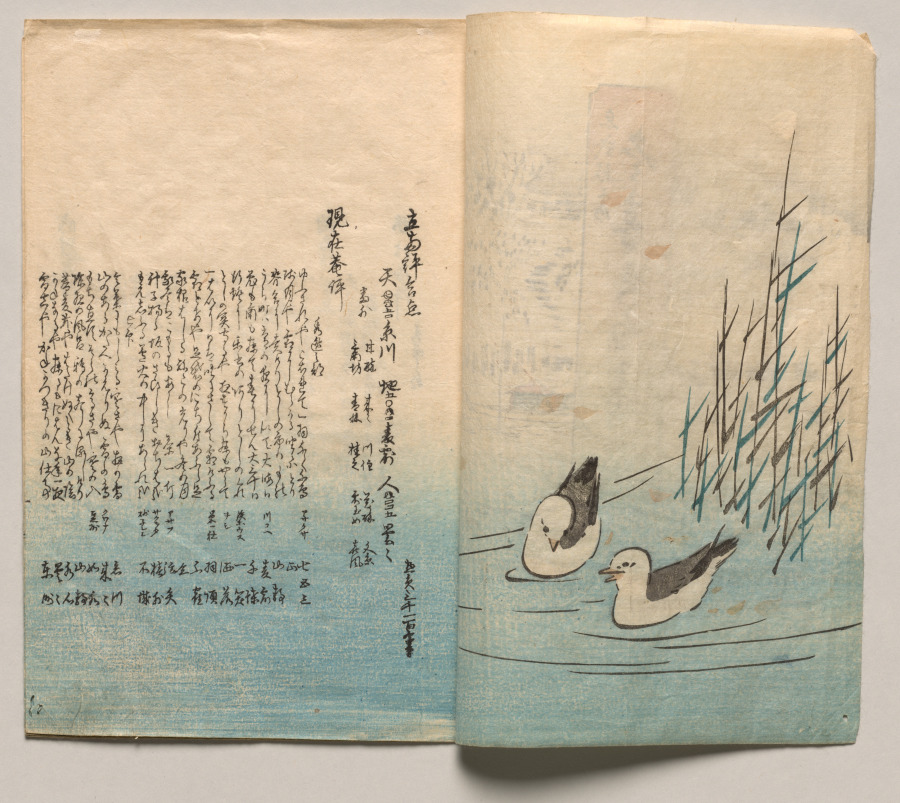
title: Spread One from Verses for Winter and Spring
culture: Japan, Edo period (1615–1868)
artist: Utagawa Hiroshige (Japanese, 1797–1858)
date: 1850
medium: Woodblock printed book; ink and color on paper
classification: Bound Volume